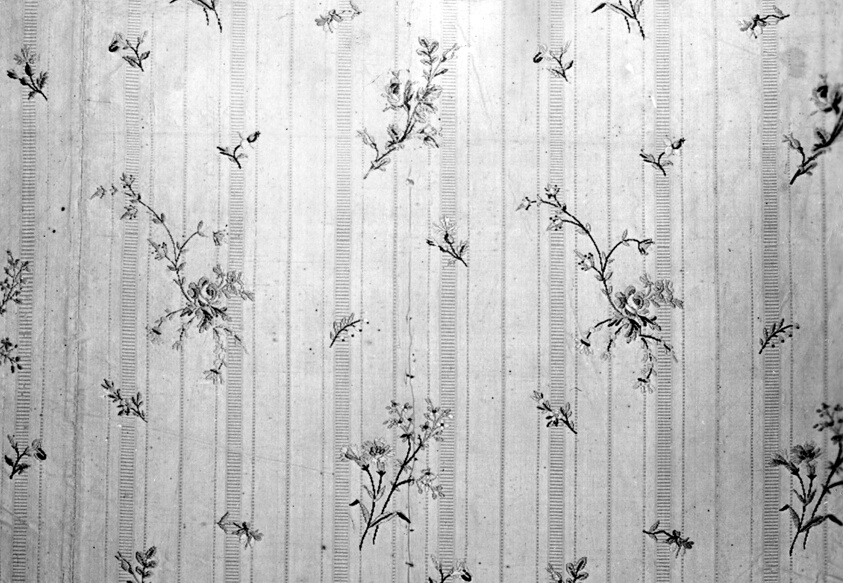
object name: Textile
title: Fragment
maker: France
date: c. 1776/79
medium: Silk, plain weave with supplementary patterning warps and supplementary brocading wefts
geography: France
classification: textile; weaving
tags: floral arrangements